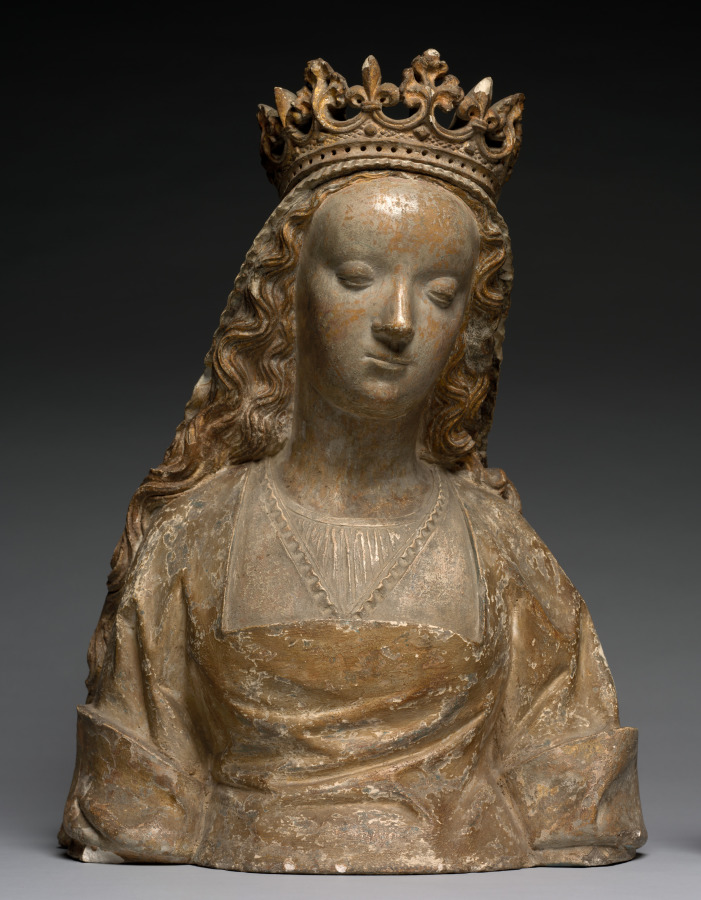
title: Bust called Anne de Bretagne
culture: France, 16th century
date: c. 1500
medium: stone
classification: Sculpture